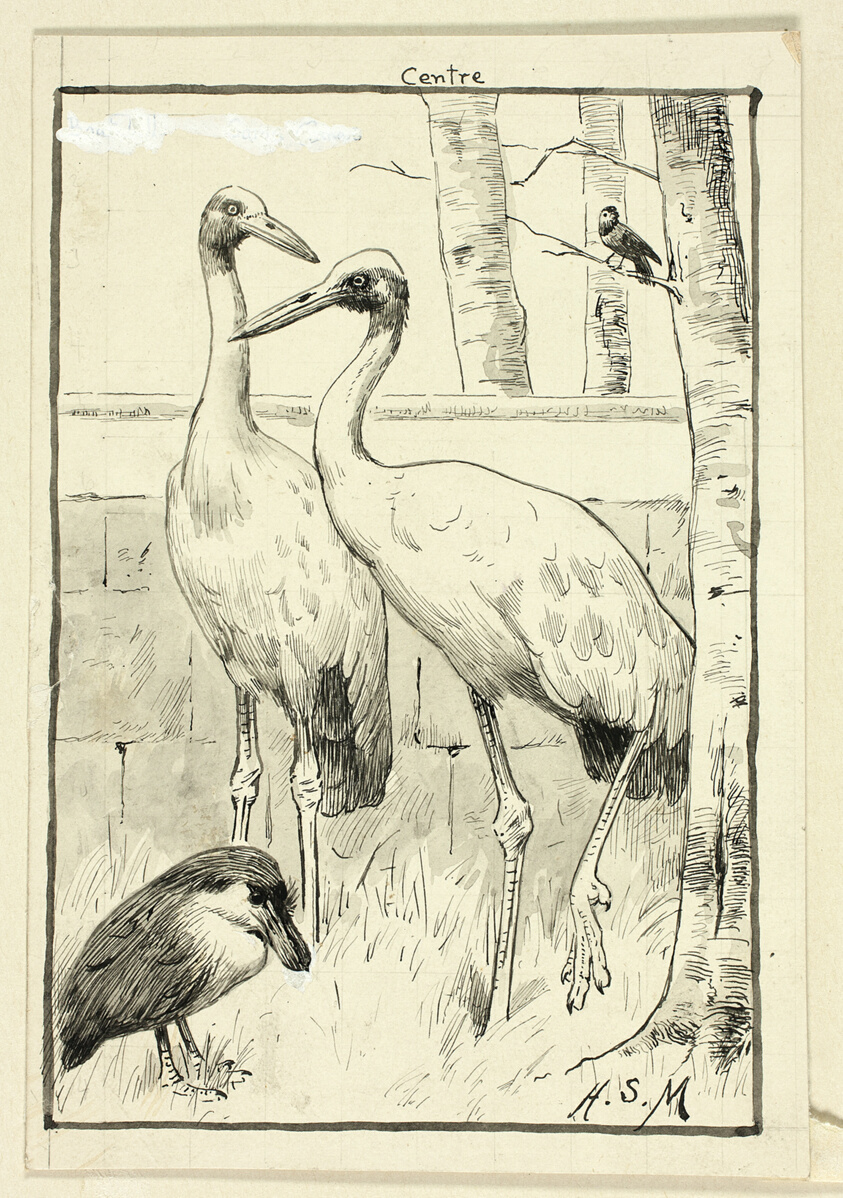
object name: Drawing and Watercolor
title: Four Birds in Landscape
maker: Henry Stacy Marks (English, 1829-1898)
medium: Pen and black ink, with brush and gray wash and white gouache, squared in graphite, on ivory wove paper, laid down on buff wove paper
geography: England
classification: pen and ink drawings; drawings (visual works); prints and drawing